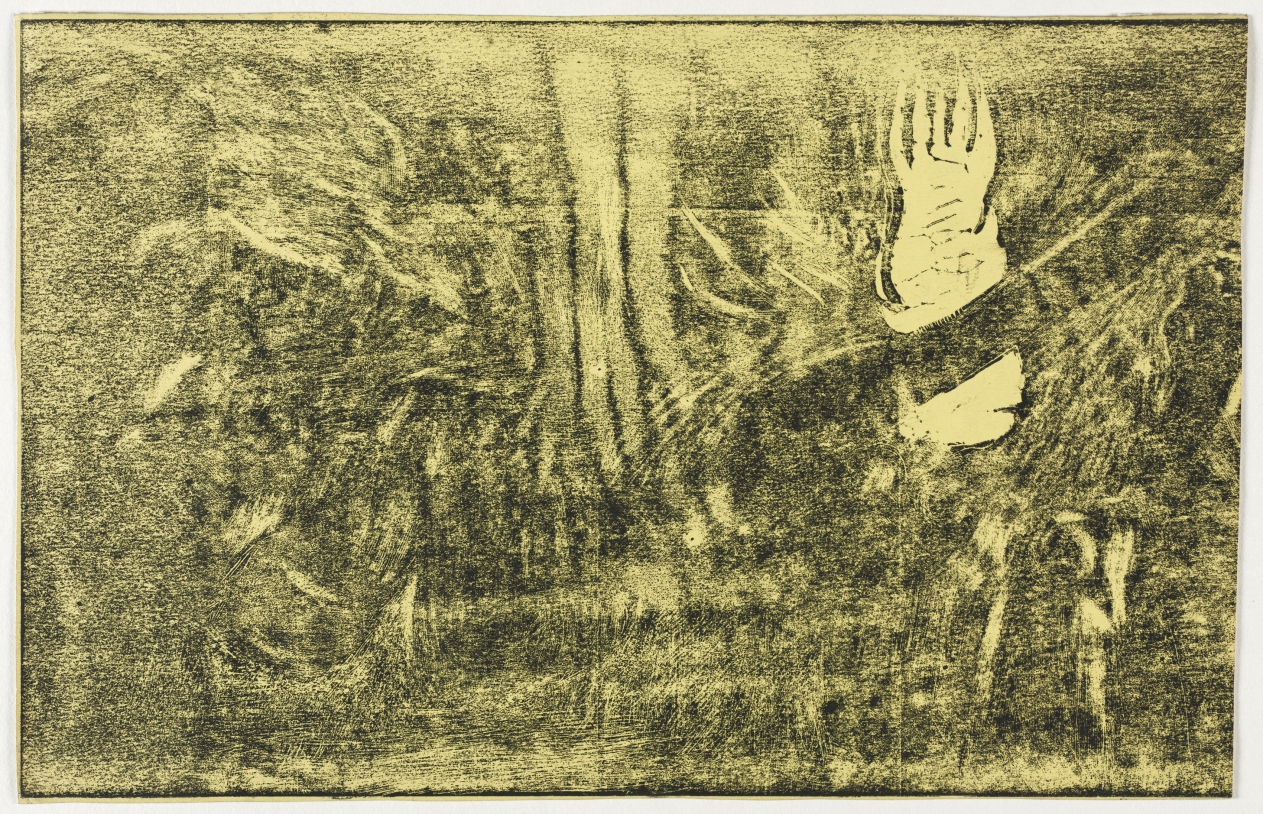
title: Noa Noa: The Devil Speaks (Mahna No Varua Ino) (recto)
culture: France, late 19th century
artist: Paul Gauguin (French, 1848–1903)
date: 1893–1894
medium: woodcut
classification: Print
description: In 1893, Paul Gauguin returned to Paris from time spent in Tahiti. He began to conceive of a book that would describe his life outside Europe and provide context for the avant-garde works he created while away. This print is one of a series of ten intended to illustrate this book, which Gauguin titled Noa Noa. He carved each image roughly into a woodblock and printed them himself, giving the prints a rough quality that he hoped would enhance their subject matter. Because of this process, combined with the artist's practice of varying his inks and papers while working, prints such as this one are virtually unique.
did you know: In 1921, Paul Gauguin's son Pola printed a new edition of his father's Noa Noa prints, wiping the woodblocks cleanly so the images were more legible.